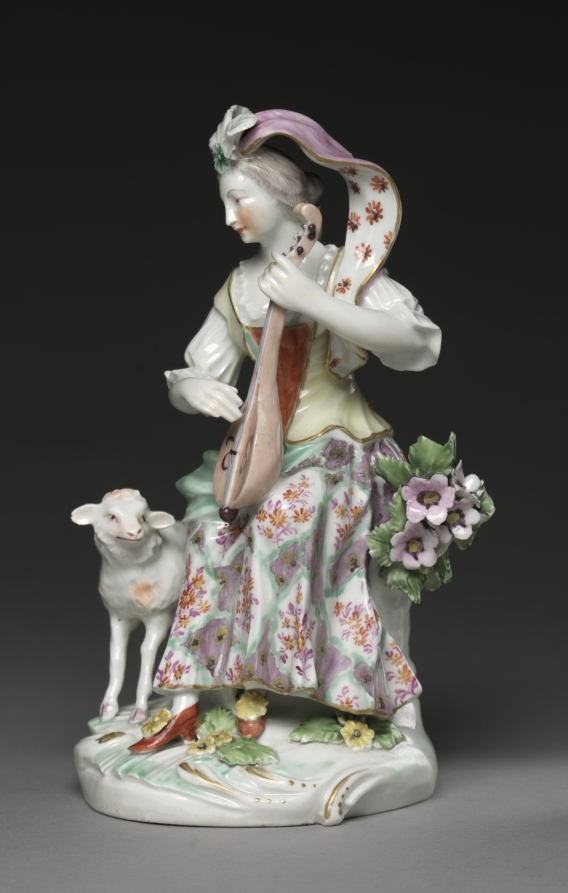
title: Seated Musician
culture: England, Derby, 18th century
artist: Derby Porcelain Factory (British)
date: c. 1765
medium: soft-paste porcelain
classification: Ceramic